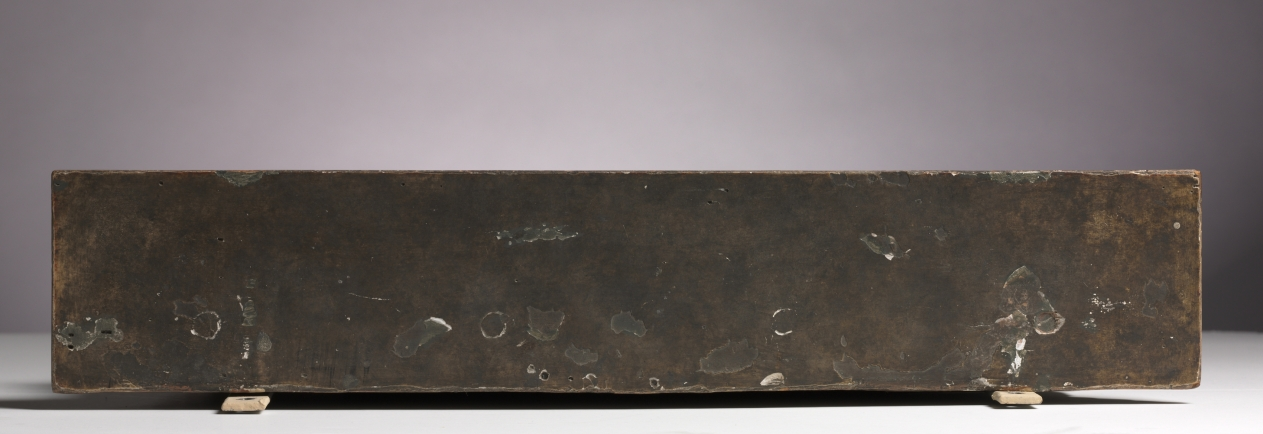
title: Virgin and Child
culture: Italy, Venice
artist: workshop of Pietro Lombardo (Italian, c. 1435–1515)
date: c. 1475–1485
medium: marble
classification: Sculpture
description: In the later 1400s, artists increasingly infused sacred subject matter with a classical vocabulary. The shallow relief and simplified forms ultimately stemmed from ancient sculpture, bringing gravity as well as novelty to a conventional theme. Yet naturalistic elements such as the baby’s bulging navel, chubby wrists, and shirt pulled up to reveal his genitals all humanize Christ, a critical principle of Christian dogma.